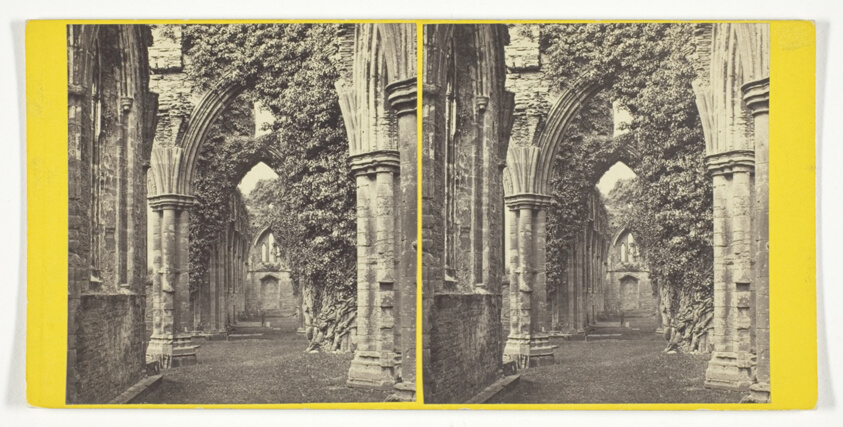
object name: Photograph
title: Tintern Abbey: South Aisles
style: 19th century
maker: Alexander Wilson (British, active late 19th century)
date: late 19th century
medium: Albumen print, stereo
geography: United Kingdom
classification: photography; photograph; albumen silver print; stereograph (albumen)